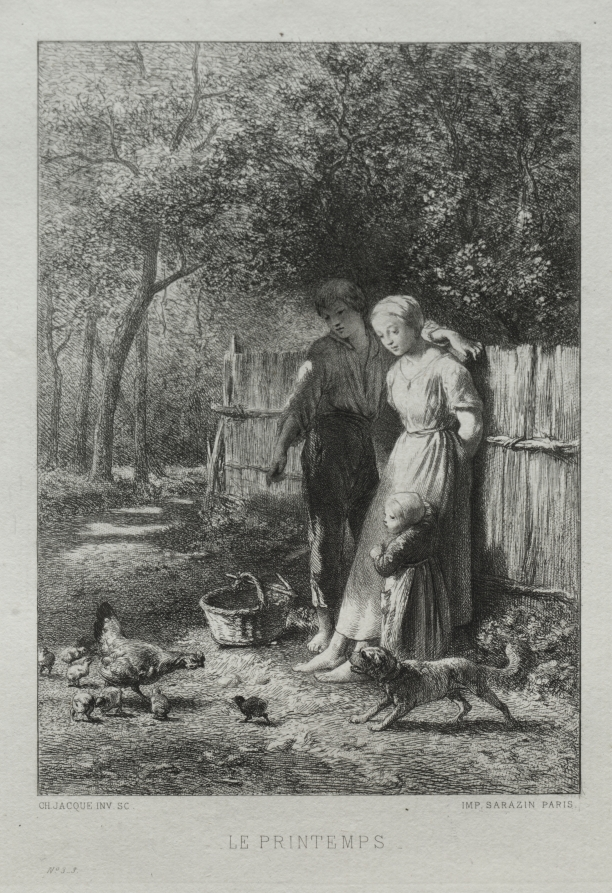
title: Springtime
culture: France, 19th century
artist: Charles-Émile Jacque (French, 1813–1894)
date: 1864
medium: etching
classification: Print